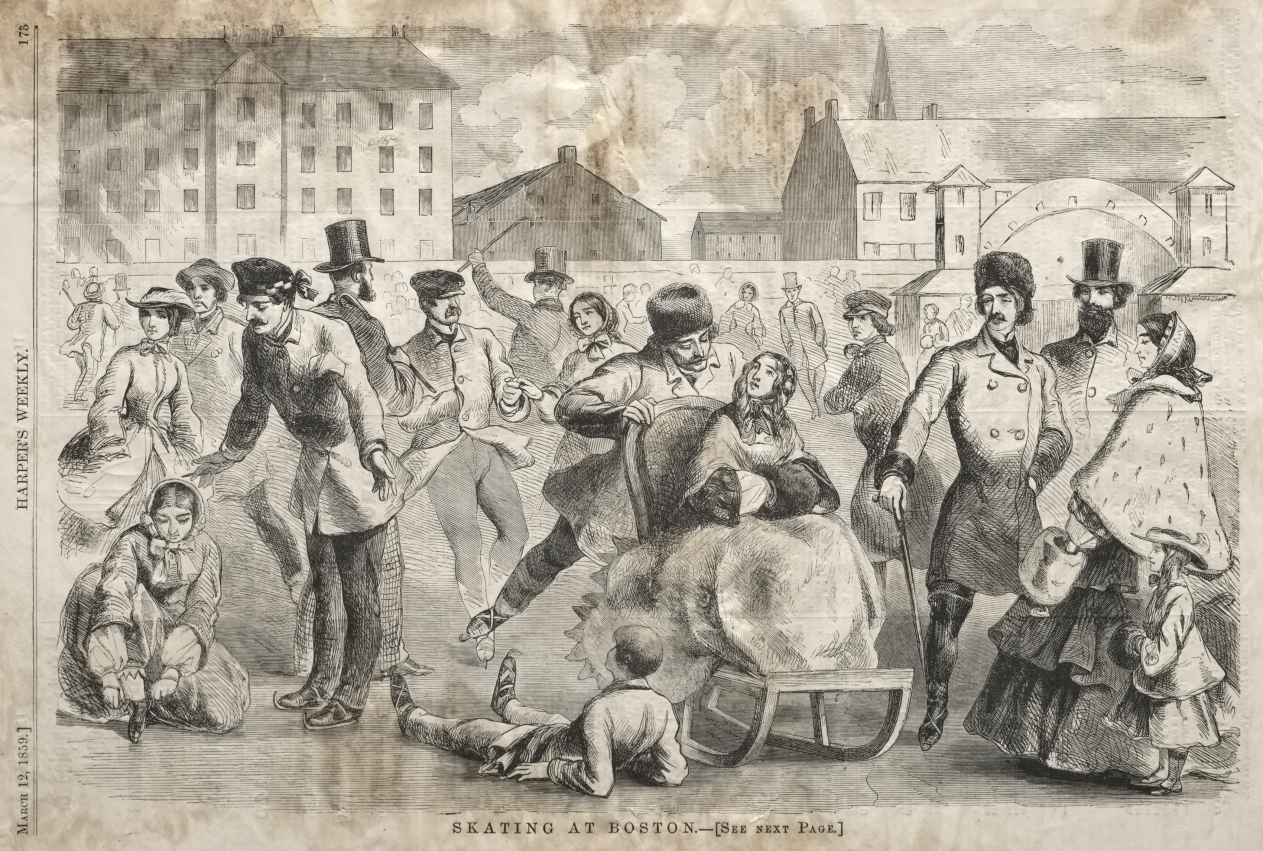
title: Skating at Boston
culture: America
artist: Winslow Homer (American, 1836–1910)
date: 1859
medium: wood engraving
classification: Print